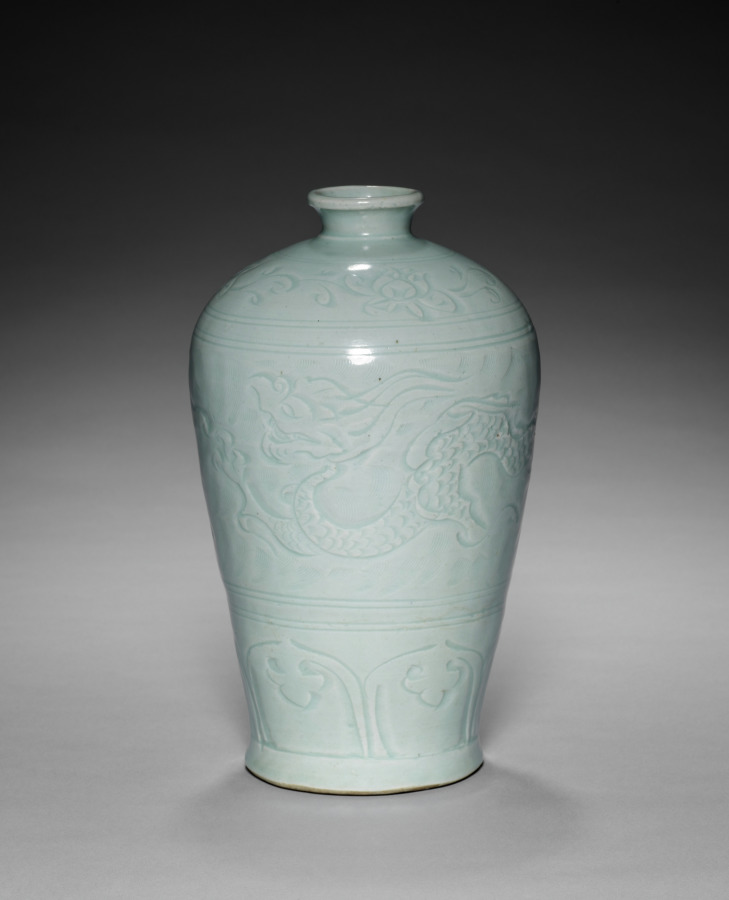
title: Meiping Vase with carved Dragon Motif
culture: South China, Yuan dynasty (1279–1368)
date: 1300s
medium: Porcelain with pale bluish-white (qingbai; 青白) glaze and carved decoration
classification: Ceramic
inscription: There are multiple self-adhesive labels on the bottom: 1. Square white (now yellowed with age) label with "90" written in red ink. 2. White rectangular label with "L.80.17.8" written in pencil. 3. Fabric tape cut to rectangular shape with "L.2161.49 /39" written in black ink. 4. White round label from Lally & Co. New York with "X2295" written in black ink.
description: A fierce coiling dragon chasing a pearl amid mist and clouds—a symbol of fertility and power—decorates this sturdy vase. Its shoulder is incised with a band of lotus flowers and the base features a border of lotus petals. Meiping, literally prunus vase, derives its name from being used to display a single floral spray, traditionally a branch of blossoming plum (or prunus), apricot, or cherry.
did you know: In Chinese mythology, the dragon is believed to transport human souls to the heavens after death.